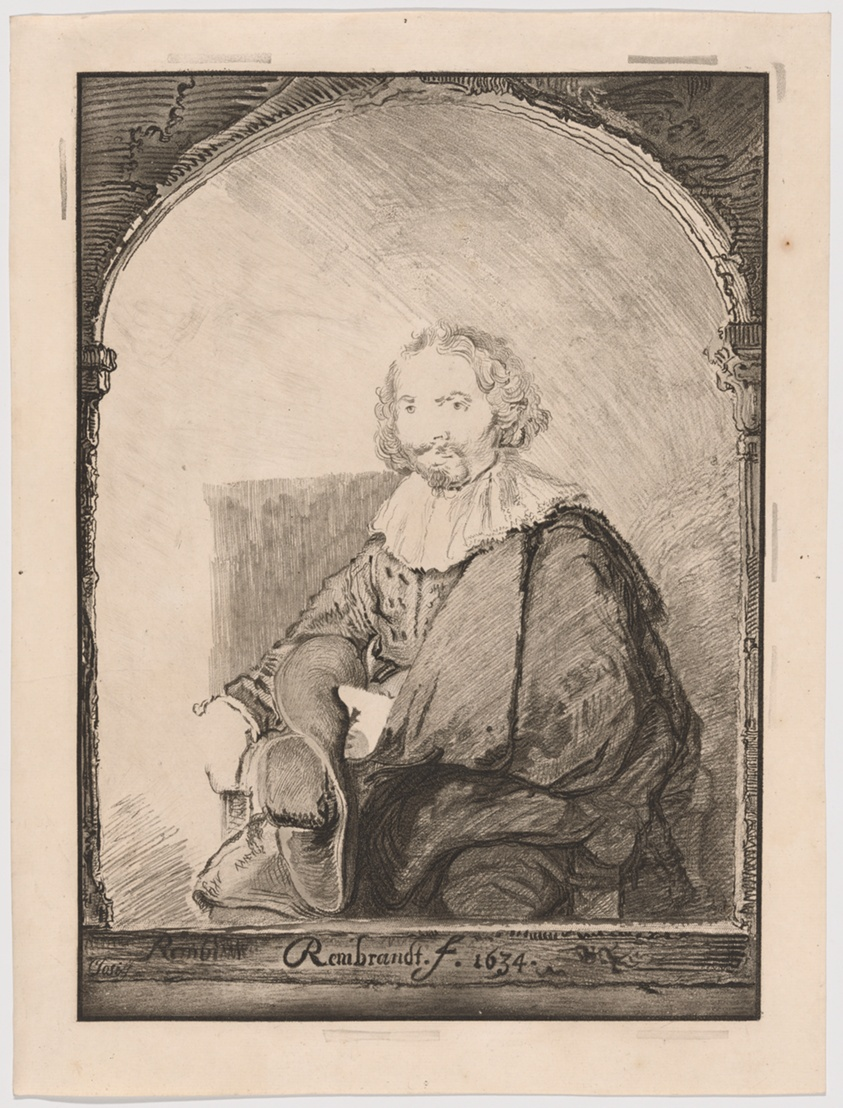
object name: Print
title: Portrait of a Man in an Armchair, from Collection d'imitations de Dessins d'après les Principaux Maîtres Hollandais et Flamands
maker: Christian Josi (Dutch, died 1828); after Rembrandt van Rijn (Dutch, 1606-1669)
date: 1826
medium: Soft ground etching, aquatint, roulette, and traces of drypoint, on ivory laid paper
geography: Holland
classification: etching; print; prints and drawing